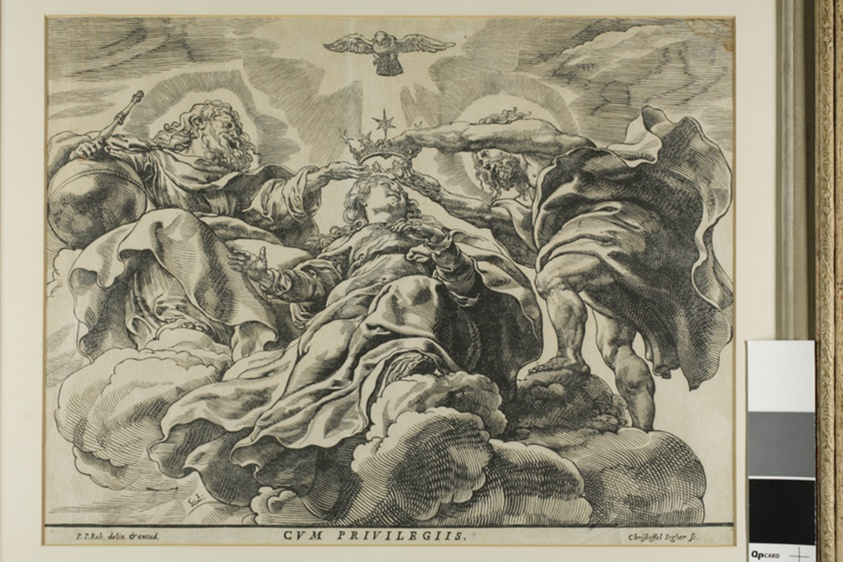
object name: Print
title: The Coronation of the Virgin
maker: Christoffel Jegher (Flemish, 1596-1652/53); after Peter Paul Rubens (Flemish, 1577-1640)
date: c. 1635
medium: Woodcut on cream laid paper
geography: Flemish Brabant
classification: woodcut; print; prints and drawing